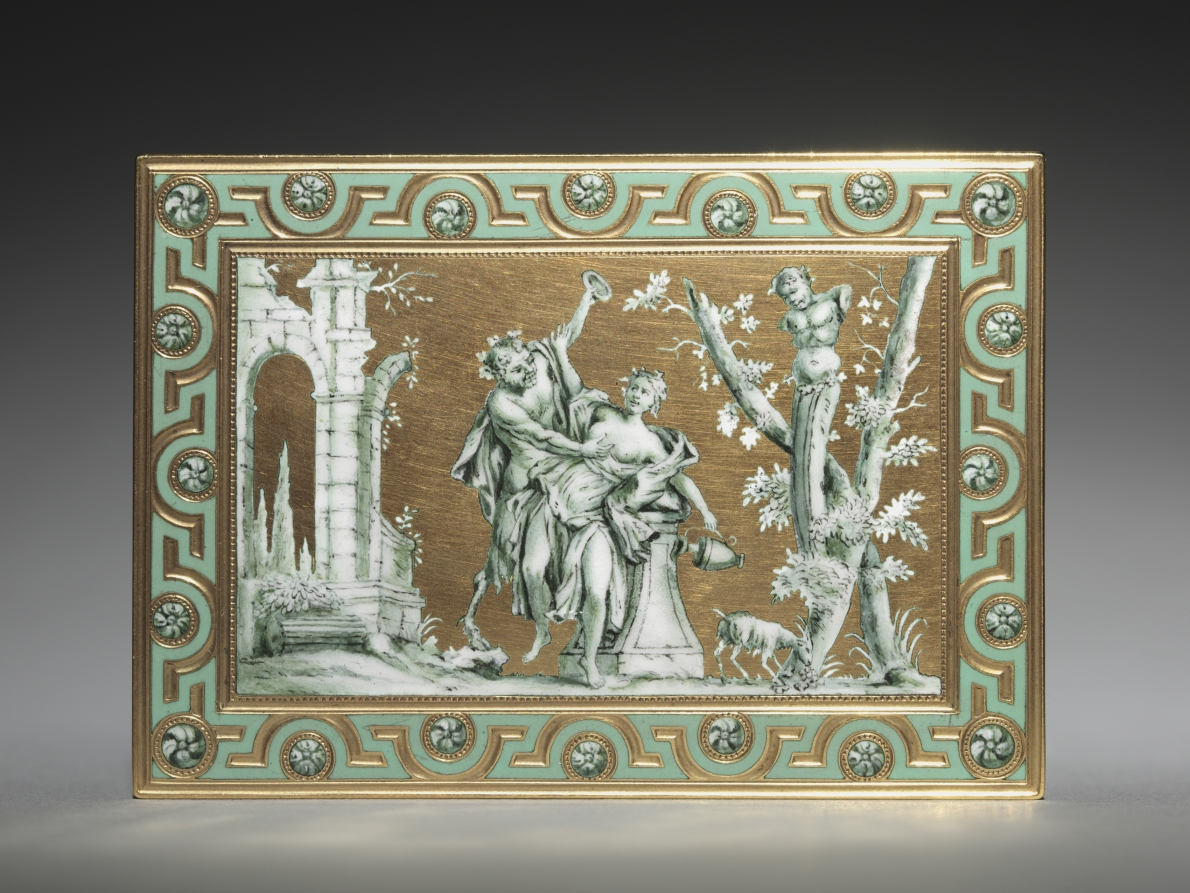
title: Box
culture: France, 18th century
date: c. 1768–1769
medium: gold and enamel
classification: Enamel